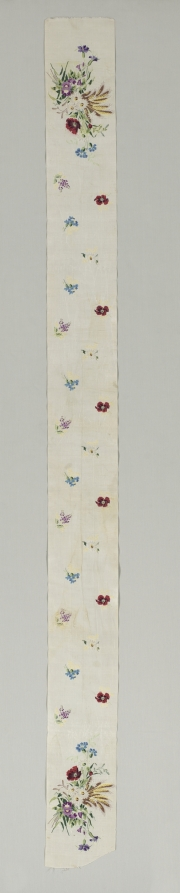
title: Brocaded Silk Ribbon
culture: France, 19th century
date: 1800s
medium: brocade, silk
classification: Textile